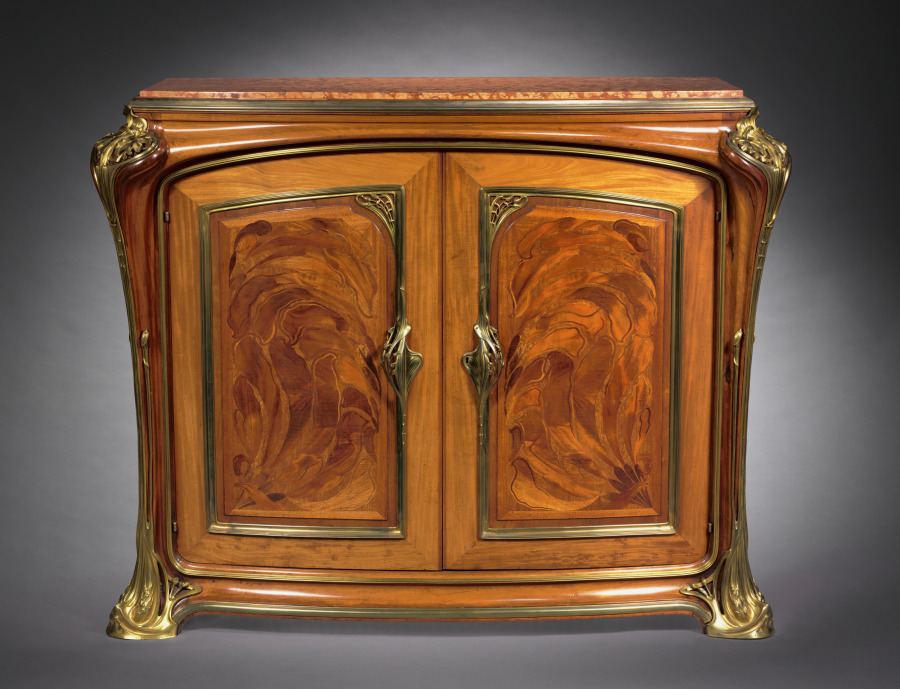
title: Cabinet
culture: France, early 20th Century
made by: Louis Majorelle (French, 1859–1926)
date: c. 1910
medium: wood marquetry with metal mounts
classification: Furniture and woodwork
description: The Majorelle family operated a large furniture making business at Nancy in eastern France. There they produced distinguished furniture in the Art Nouveau style. That style is well illustrated in the curvilinear, abstract wood marquetry (an inlaid, veneered pattern) on the doors of this cabinet.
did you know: Let your eye trace the sinuous lines and leafy forms of this chest. Its design emphasizes the beauty of the wood, celebrating nature. Louis Majorelle designed it in the Art Nouveau style.